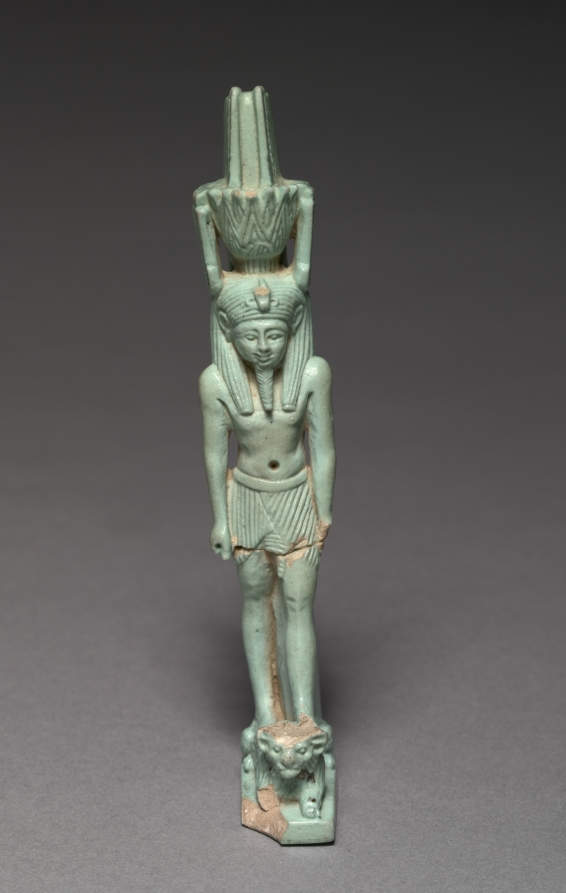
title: Amulet of Nefertem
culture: Egypt, Late period (715–332 BCE), Dynasties 27–30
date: 525–343 BCE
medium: faience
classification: Amulets